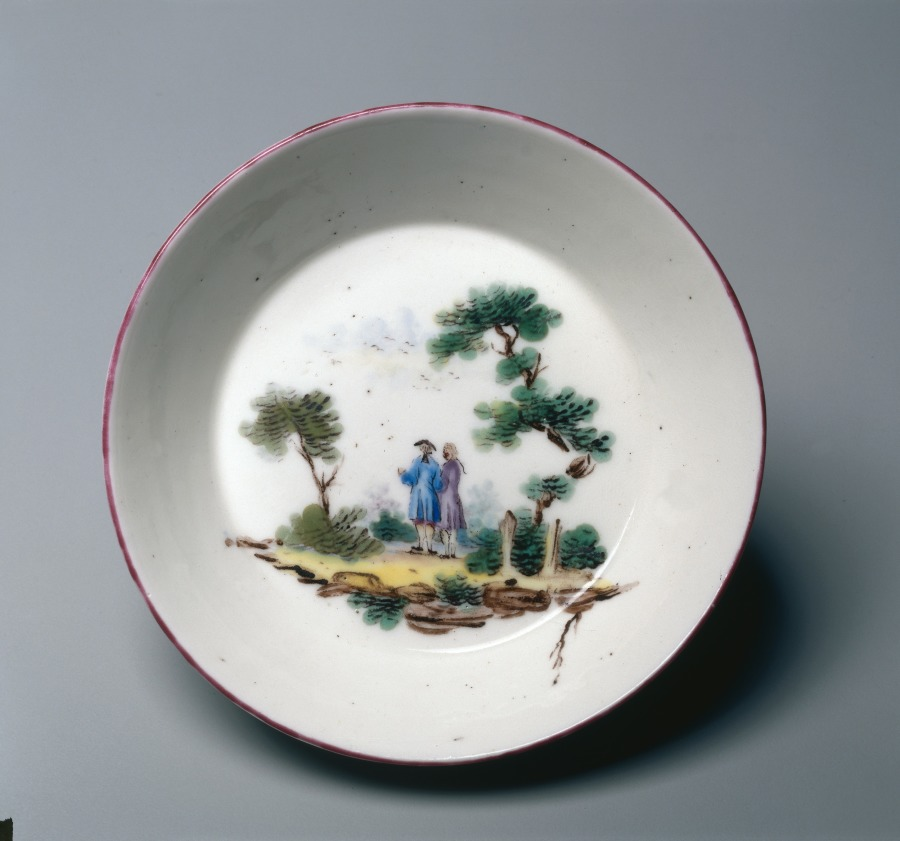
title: Saucer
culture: France, 18th century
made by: Sceaux Factory (French, active 1748–66)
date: c. 1775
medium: soft-paste porcelain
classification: Ceramic